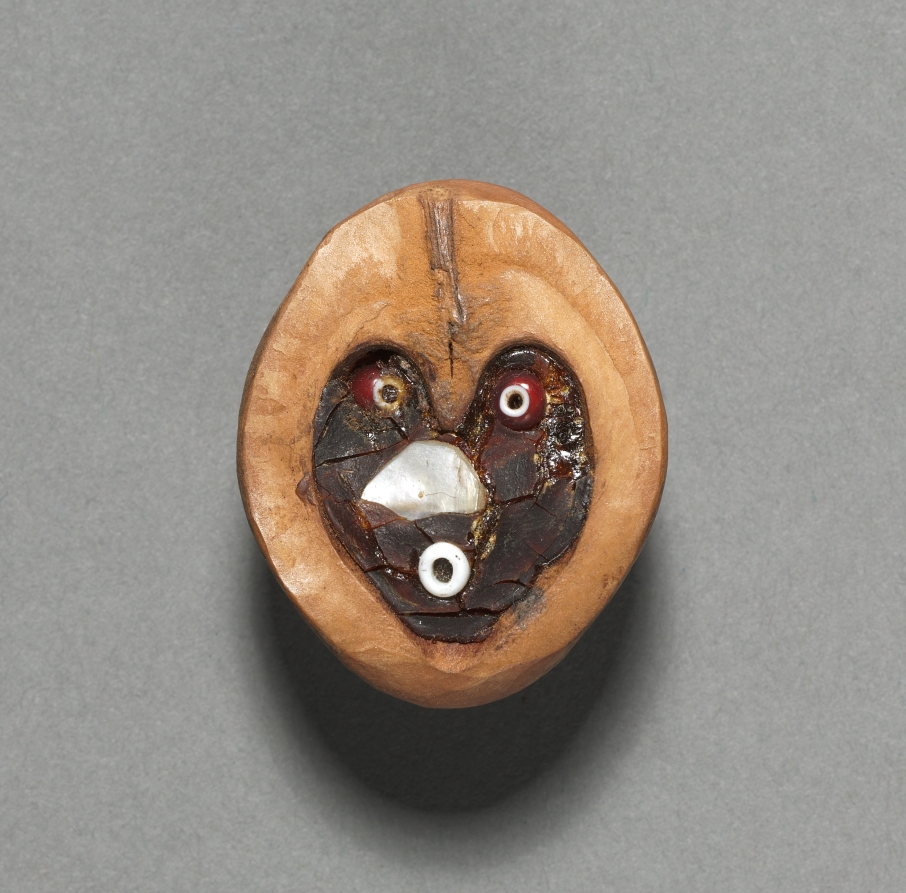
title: Gambling Dice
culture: California, Tulare, Unassigned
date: before 1917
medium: hollow shell, resin, glass beads, mica/seashell fragment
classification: Implements